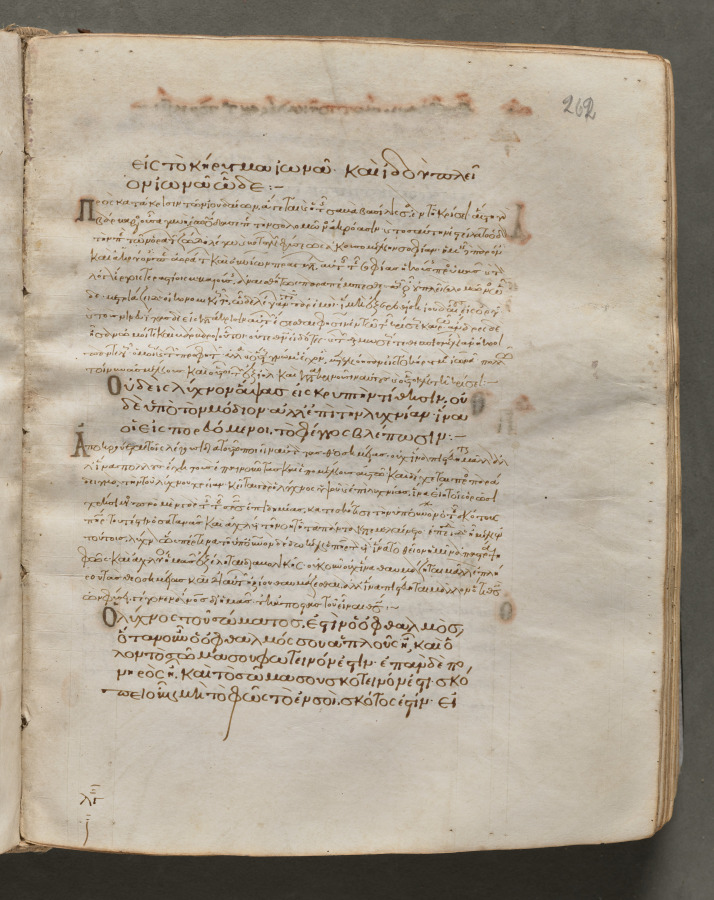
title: Text, folio 262 (recto), from a Gospel Book with Commentaries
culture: Byzantium, Constantinople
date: c. 1000–1100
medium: ink, tempera, and gold on vellum; leather binding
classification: Bound Volume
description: Each of the four gospels in this book opens on a page with brilliantly illuminated borders depicting the author of the text as well as birds—principally peacocks, symbols of the immortality of the soul—and fountains, representing the fountain of life and the salvation of the soul. This volume consists of 428 leaves with texts in Greek. Its level of sophistication suggests that it was probably written and decorated in a monastery in Constantinople.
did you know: Gospel books were carried in procession through Byzantine churches.